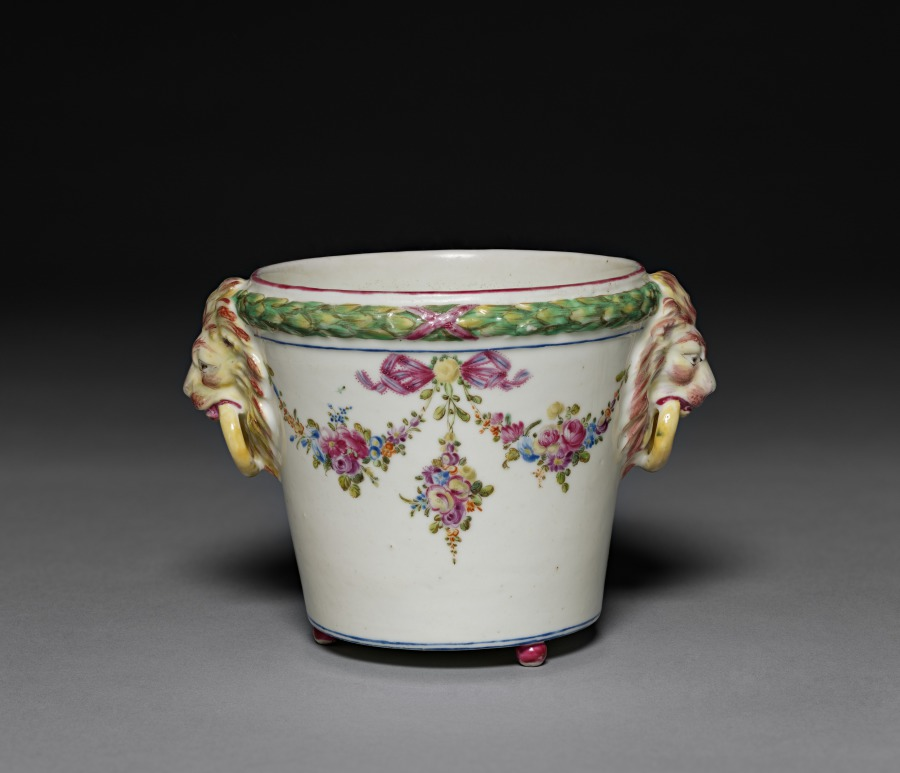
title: Cachepot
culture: France, Bourg-la-Reine, 18th century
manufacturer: Bourg-la-Reine Factory (French)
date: c. 1775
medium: soft-paste porcelain with enamel decoration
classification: Ceramic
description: The mark on this piece indicates that it was made after the Mennecy factory was moved to Bourg-la- Reine in 1773. The tradition of Mennecy's decoration on soft-paste porcelain can be recognized in the piece, but its style has been modified in response to the emerging neo-classic taste. The flowers are now organized into formal garland's and motifs of classical origin, such as the lion's heads, are introduced.